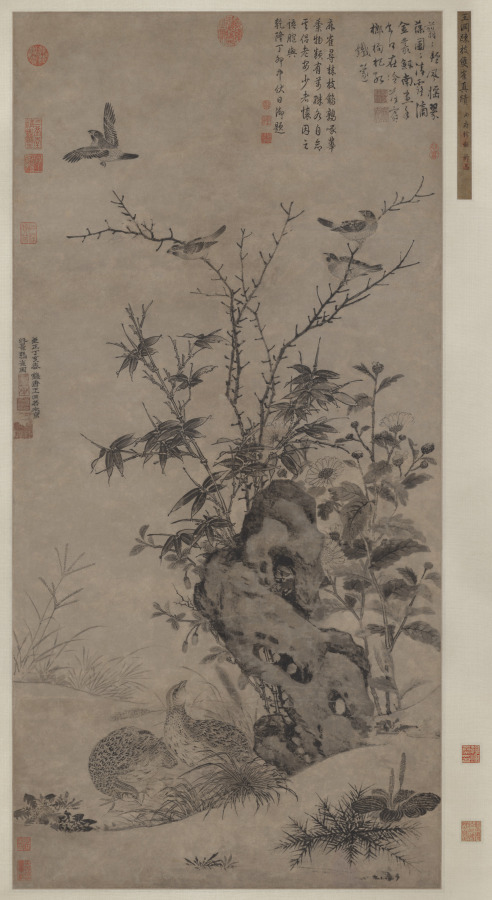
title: Quails and Sparrows in an Autumn Scene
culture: China, Yuan dynasty (1271-1368)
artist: Wang Yuan (Chinese, c. 1299-after 1366)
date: 1347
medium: hanging scroll, ink on paper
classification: Painting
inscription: 至正丁亥春 錢塘王淵若水寫秋景鶉雀圖 [印] 澹轩; [印] 若水; [印] 墨妙筆精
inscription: 翦翦輕風搖翠葆，團團清露滴金叢。 劍南畫手今何在，冷落賓榔枸杞新。 鐵篴 [印] 杨维桢印; [印] 廉夫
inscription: 1 inscription and 10 seals of the Qianlong emperor (r. 1736-95)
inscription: 4 seals of Zhang Heng 張珩 (1915-1963)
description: The flower-and-bird subjects here are depicted in a meticulous manner, echoing the academic tradition but translating the customarily colored images to plain monochrome. Fine ink lines combined with carefully graded washes define the contours and give subtle modeling to the natural forms. Wang Yuan excelled in flower-and-bird subjects as well as landscape and figure paintings. A child prodigy, he was instructed by the great Yuan master Zhao Mengfu at an early age.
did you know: Wang Yuan was from Qiantang, today’s Hangzhou in eastern China.